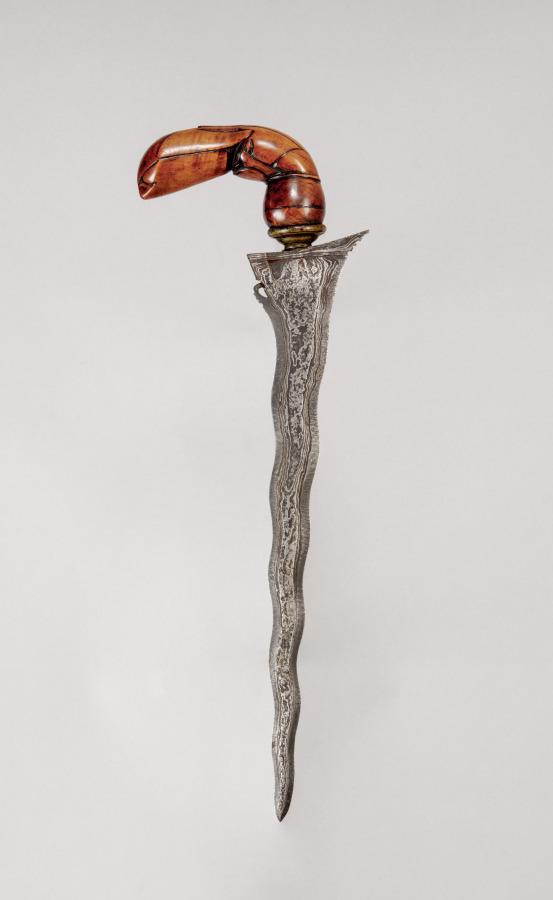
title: Sword (Kris)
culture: Java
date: 1800s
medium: iron with wooden handle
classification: Arms and Armor